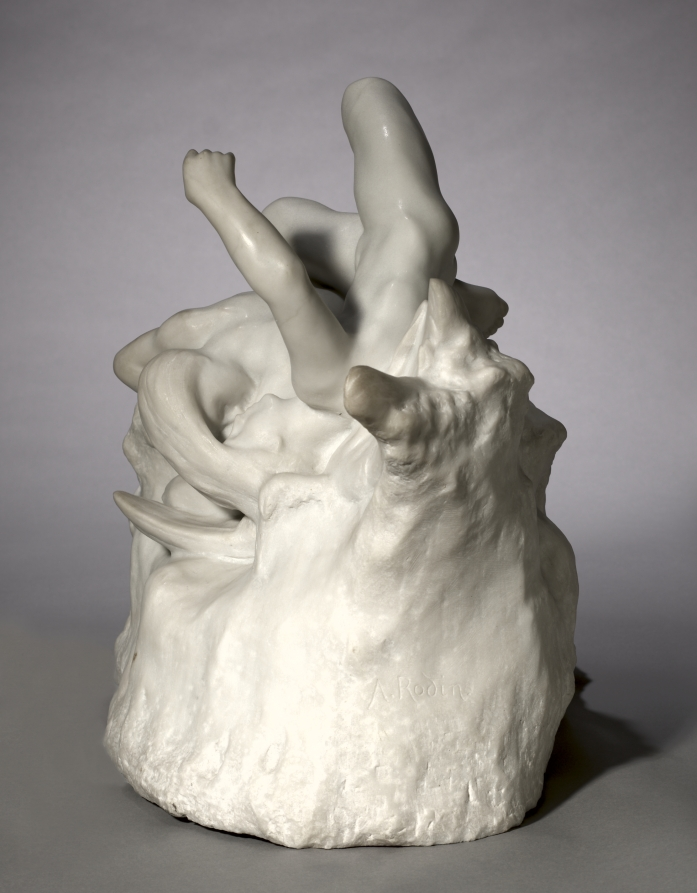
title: The Fall of the Angels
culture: France, late 19th-early 20th Century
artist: Auguste Rodin (French, 1840–1917)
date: c. 1890–1900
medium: marble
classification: Sculpture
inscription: signed under dexter wing of male figure: A. Rodin.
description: The entwined couple in this sculpture recalls the figures on Rodin’s monumental doorway The Gates of Hell. Struck by Dante Alighieri’s descriptions of the damned suffering in hell because of their sins of the flesh, Rodin populated his portal with embracing lovers symbolic of carnal desire and sensual pleasure. Here, a winged figure alludes to the biblical account of the angels who were cast out of Heaven after siding with Satan (Revelation 12:4). Rodin preferred marble for erotic subjects. The juxtaposition between the smooth, sensual surfaces of the figures and the rough-hewn areas below gives the impression that the couple is blossoming into life from hard, lifeless stone.